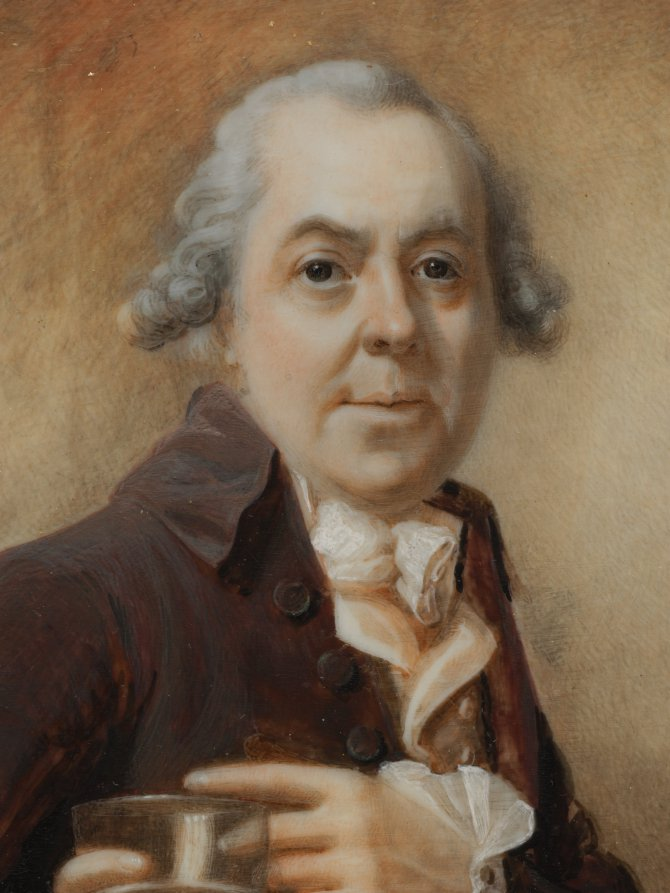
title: Portrait of a Man Holding a Glass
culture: England, late 18th century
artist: Joseph Daniel (British, c. 1760–1803)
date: c. 1780s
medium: watercolor on ivory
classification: Portrait Miniature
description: Joseph Daniel was the son Nochaniah Daniel of Bridgewater, Somerset, and among the first known Jewish artists of South West England. Joseph’s work has often been confused with that of his brother Abraham, with whom he competed for patronage. Neither commonly used his forename in signature nor in advertisement, possibly with a view to capitalize on the other’s clientele. Little is known about the brothers’ education apart from the fact that they were trained by their mother. Joseph seldom exhibited his miniatures in public. Only in recent years has there been an increased confidence in distinguishing his works from those of Abraham, resulting from the discovery of a handful of miniatures signed with first initials. The primary distinction between their styles is usually cited as Joseph’s greater attention to detail and his use of gray tones in shading. This outstanding miniature dating from the 1780s is unsigned, as was typical of Daniel’s practice. The sitter is conventionally dressed, wearing a powdered wig and a cream-colored cravat and waistcoat under a dark brown frock coat against which the delicacy of the translucent frilled cuffs is especially pronounced. There is evidence on the painted surface that Daniel adjusted the position of the index finger on the man’s left hand as well as the rightmost curls of his wig. The background is a mottled rusty brown, spot lit to pale brown in the center. The pallor of the sitter’s face, framed by gray hair and a blanched background, reinforces the intensity of his dark eyes, which confront the viewer directly. The face is sensitively described with broad gray shadows. Daniel’s attention to detail is evident in the reflection of the window in the curved glass of the goblet. The goblet, while acting as a central element in the picture, is not a refined object; instead, it is a heavy, plain vessel significant for its contents: water from Bath’s natural hot springs. This type of virtuoso portrait may have been displayed in the artist’s studio to attract clients and refers to the spa culture of Bath, a critical site for social maneuvering in eighteenth- and early-nineteenth-century England.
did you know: While some highly successful artists were able to support themselves by working only in miniature, it was more common for them to work in a variety of media like Joseph Daniel who was a miniature painter, engraver, and jeweler who also executed pictures in oil, crayon, and hairwork.